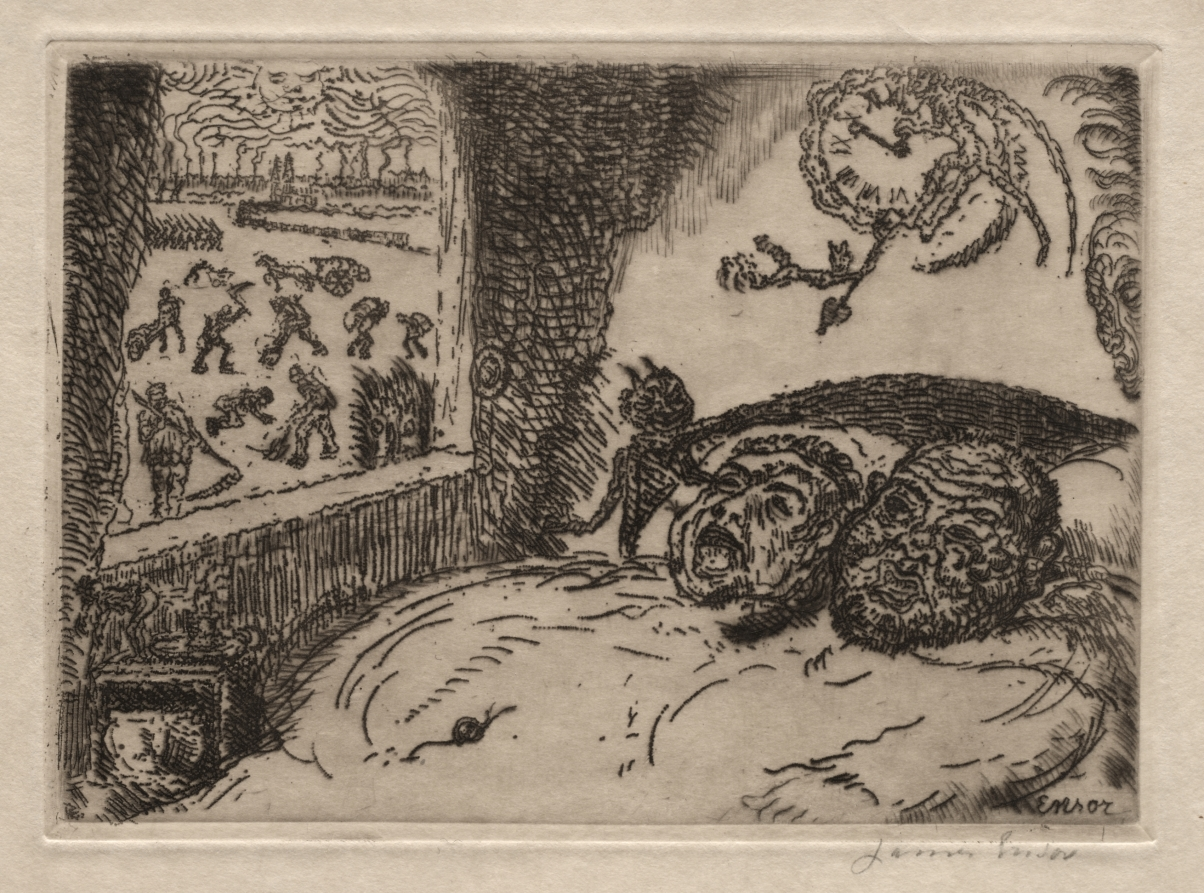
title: The Seven Deadly Sins: Sloth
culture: Belgium, 19th-20th Century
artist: James Ensor (Belgian, 1860–1949)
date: 1902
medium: etching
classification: Print